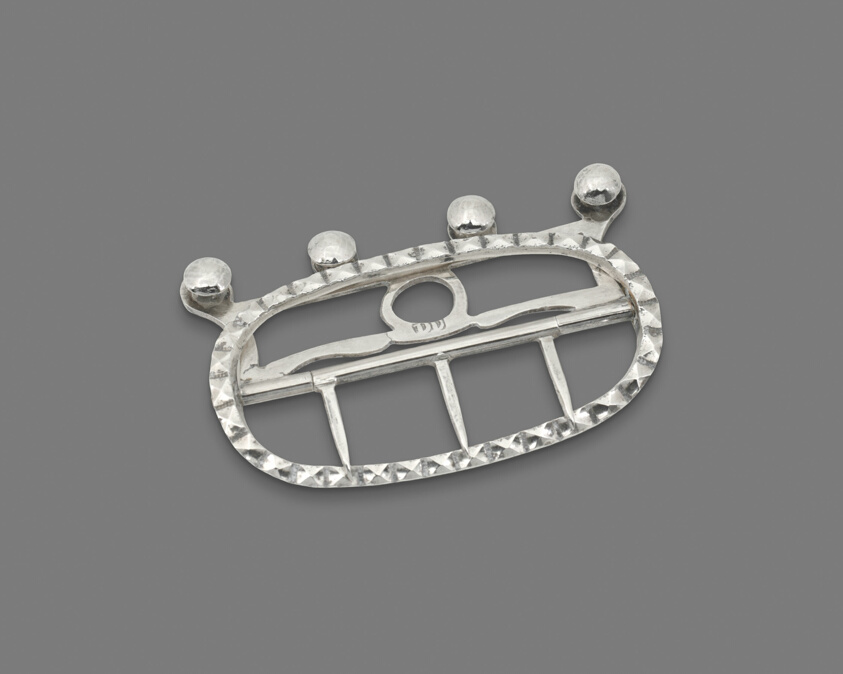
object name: Costume and Accessories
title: Stock Buckle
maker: Daniel Dupuy; American, 1719–1807; Philadelphia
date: 1745–75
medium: Silver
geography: Philadelphia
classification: buckle (strap accessory); belts (costume accessory); costume accessory worn at waist or below; silver; american decorative arts; american arts; decorative arts